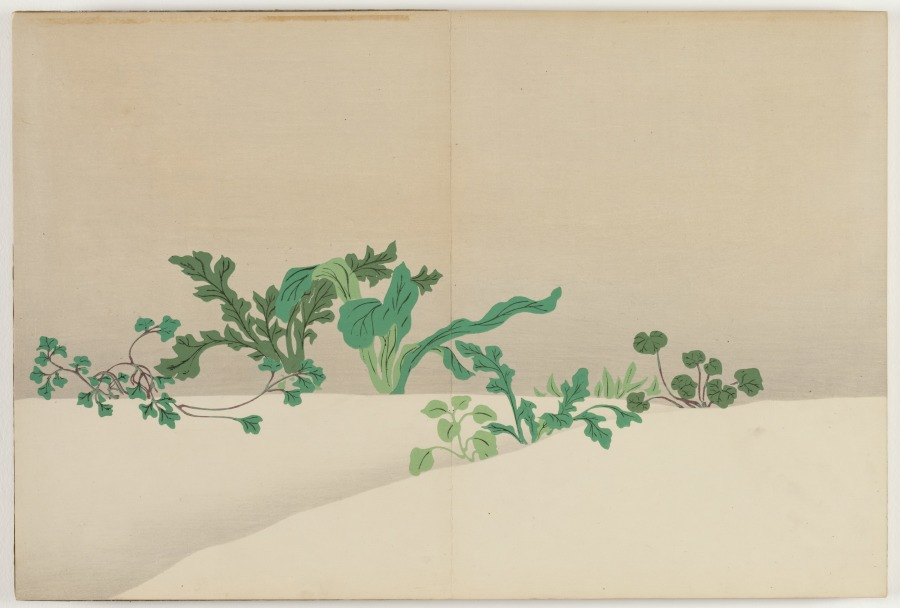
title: Flowers of a Hundred Worlds (Momoyogusa): Seven Herbs of Early Spring (Nanagusa)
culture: Japan, Meiji period (1868–1912)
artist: Kamisaka Sekka (Japanese, 1866–1942)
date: 1909–10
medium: color woodcuts with gold and silver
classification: Bound Volume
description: This print from a set of three woodblock printed albums displays the graphic design prowess of Kamisaka Sekka. The images were first distributed one by one to subscribers to the series but later were reissued in bound form, like this book, for mass consumers. Each print features a vignette taken from nature or Japanese literature. Many of the scenes have a long history in Japan, originating in the 900s or 1000s and having been interpreted by all manner of artists since that time. Sekka’s selections hew closely to precedents from the Rinpa style originated by painter Tawaraya Sōtatsu (c. 1570–c. 1640) and calligrapher Hon’ami Kōetsu (1558–1637).